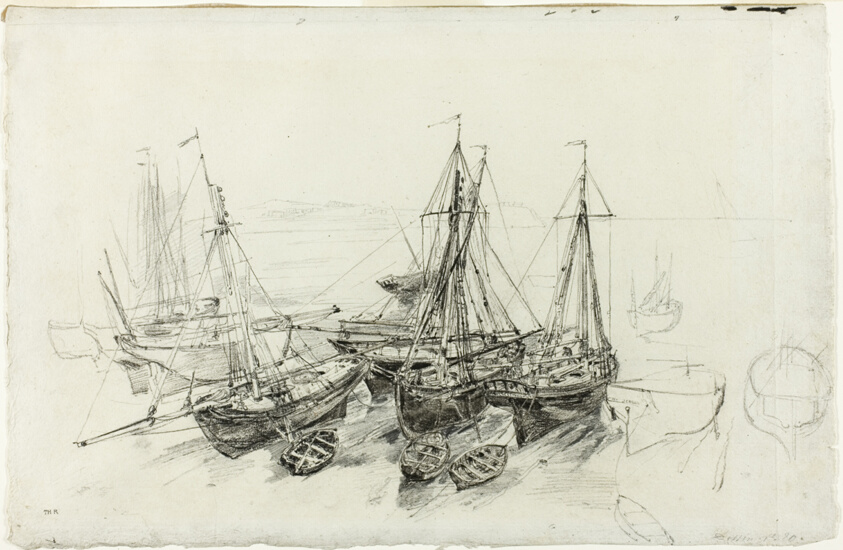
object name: Drawing and Watercolor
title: Fishing Boats at Granville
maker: Théodore Rousseau (French, 1812-1867)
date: c. 1851–52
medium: Black crayon and graphite, with stumping, and touches of scraping, over traces of red chalk, on off-white laid paper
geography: France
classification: charcoal; drawings (visual works); prints and drawing